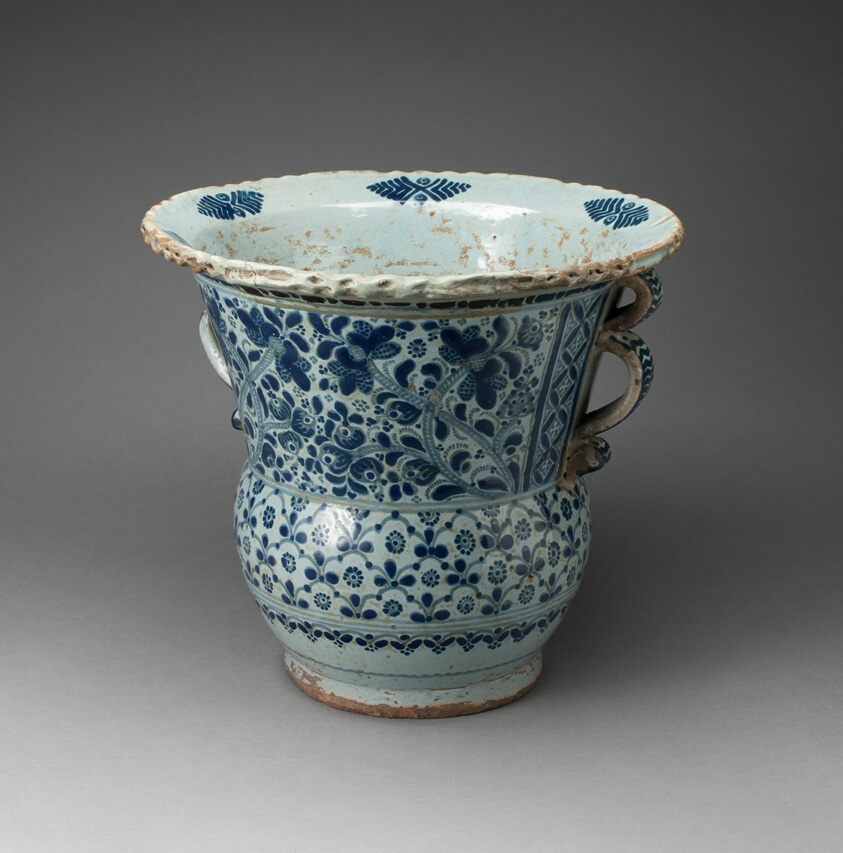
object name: Vessel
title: Jardinière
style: spanish colonial, european, Arts of the Americas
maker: Talavera poblana; Puebla, Mexico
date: 1800–50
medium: Tin-glazed earthenware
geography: Puebla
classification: earthenware; european decorative arts; ceramics; vessel; art of the americas